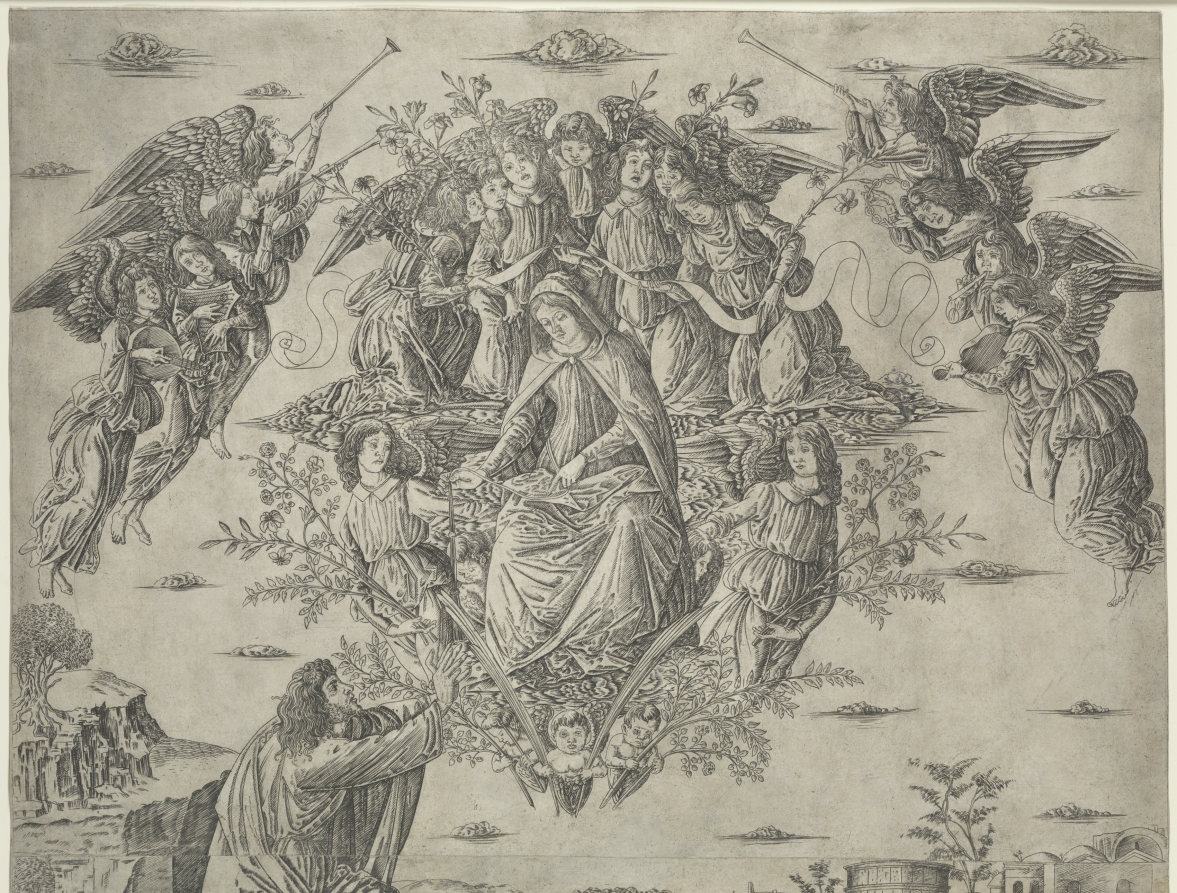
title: The Assumption of the Virgin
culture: Italy, Florence, 15th century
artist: Francesco Rosselli (Italian, 1448-about 1513)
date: c. 1495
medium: engraving printed on two sheets from two plates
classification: Print